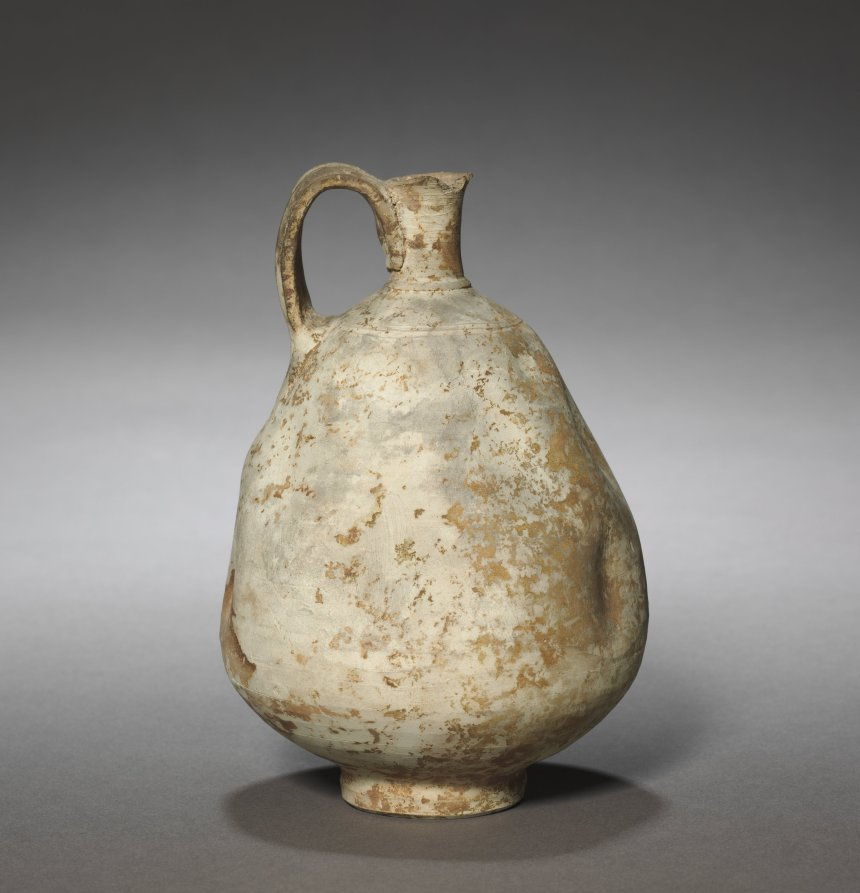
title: Jug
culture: Iran or Iraq, Seljuq period (1037–1194)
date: 1100s–1200s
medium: earthenware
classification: Ceramic